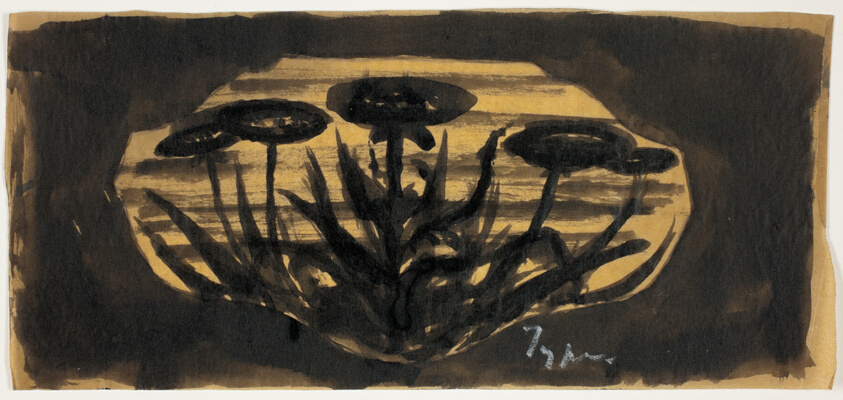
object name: Drawing and Watercolor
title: Untitled Drawing for Frame Cartouche (Plant Motif)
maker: Theodore Roussel (French, worked in England, 1847-1926)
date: 1899/1908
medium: Brush and black ink on semi-transparent tan wove paper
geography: England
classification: drawings (visual works); prints and drawing